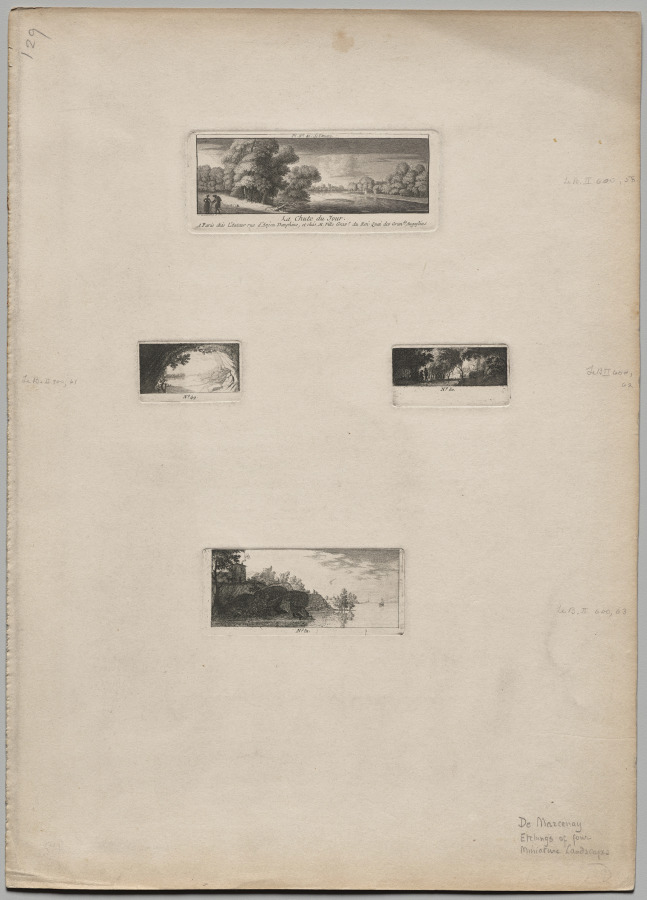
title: Etchings by Antoine de Marcenay de Ghuy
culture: France, 18th century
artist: Antoine de Marcenay de Ghuy (French, 1724–1811)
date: c. 1771–78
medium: etching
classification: Print